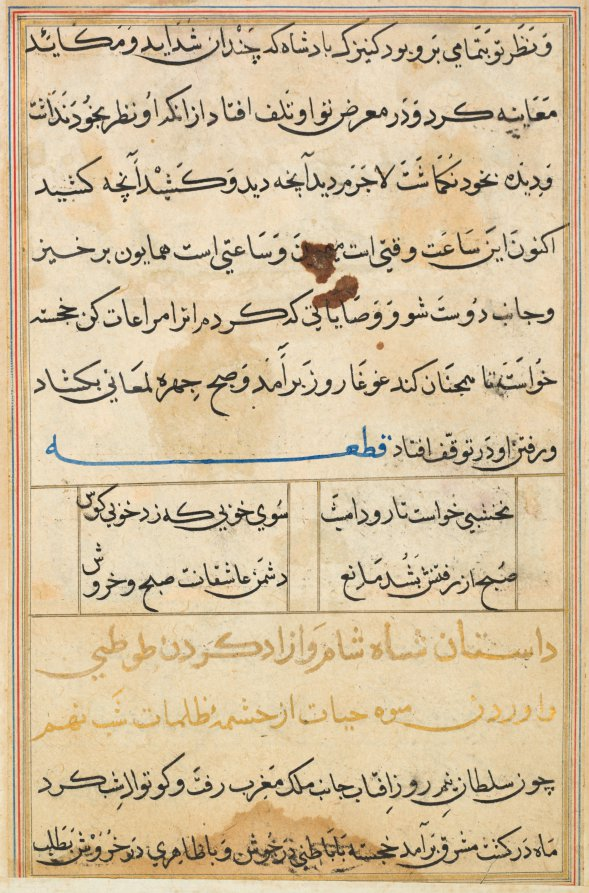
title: Page from Tales of a Parrot (Tuti-nama): text page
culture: Mughal India, court of Akbar (reigned 1556–1605)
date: c. 1560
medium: gum tempera, ink, and gold on paper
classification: Painting